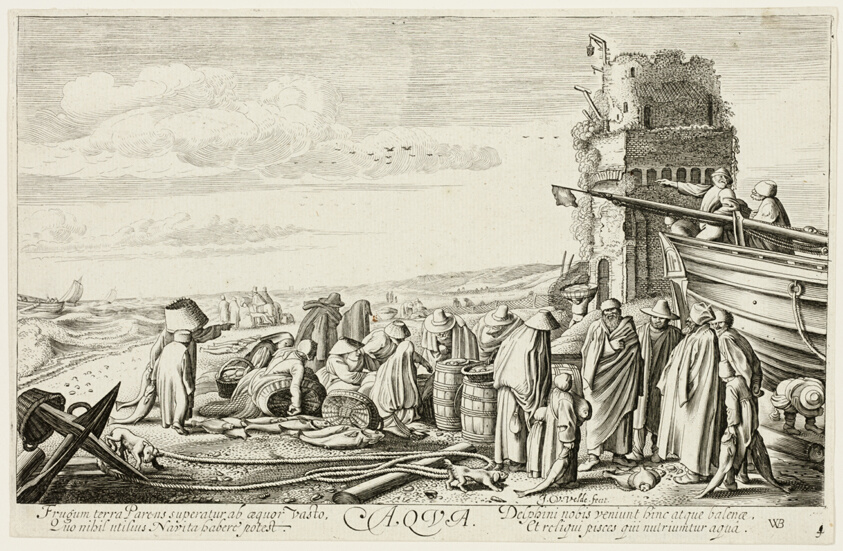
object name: Print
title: Water, plate three from The Four Elements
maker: Jan van de Velde II (Dutch, c.1593-1641); after Willem Buytewech (Dutch, 1591/92-1624)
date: 1622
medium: Etching and engraving on ivory laid paper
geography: Holland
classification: etching; print; prints and drawing